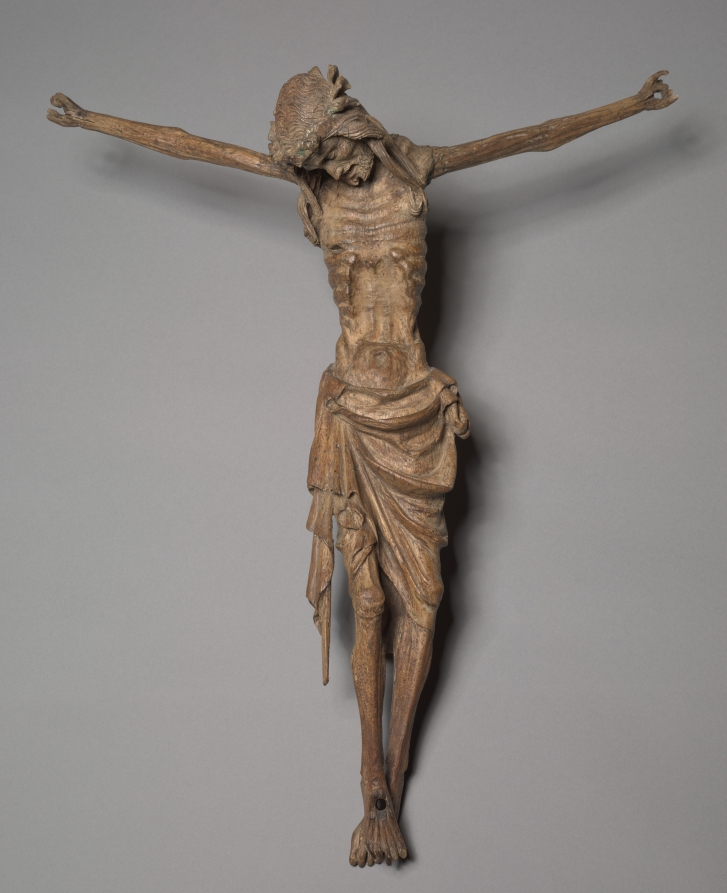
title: Crucified Christ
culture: Germany, Cologne, 14th century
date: c. 1340–1350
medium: wood (walnut) once polychromed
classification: Sculpture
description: The striking impression of this figure is the vivid representation of suffering. The sculpture captures the moment after Christ’s death: the drooping head on a frail neck is a mask of agony. The eyes are nearly shut, the mouth is ajar, and the forehead crowned by heavy, gouging thorns is drawn with pain. The elongation of the body is emphasized by the emaciated chest with protruding ribs and bony limbs. The resulting sense of frailty and pathos is augmented by the heavy strands of hair that uncurl alongside the tormented face and by the loincloth folds that break the downward drape of the body. The sculpture belongs to a group of emotional crucifixes and pietas carved in the Middle-Rhine region for over a century beginning around 1300, examples of which are principally found in the city of Cologne. Such sculptures appealed to the Rhenish mystics, who advocated meditation based on the Passion of Christ.